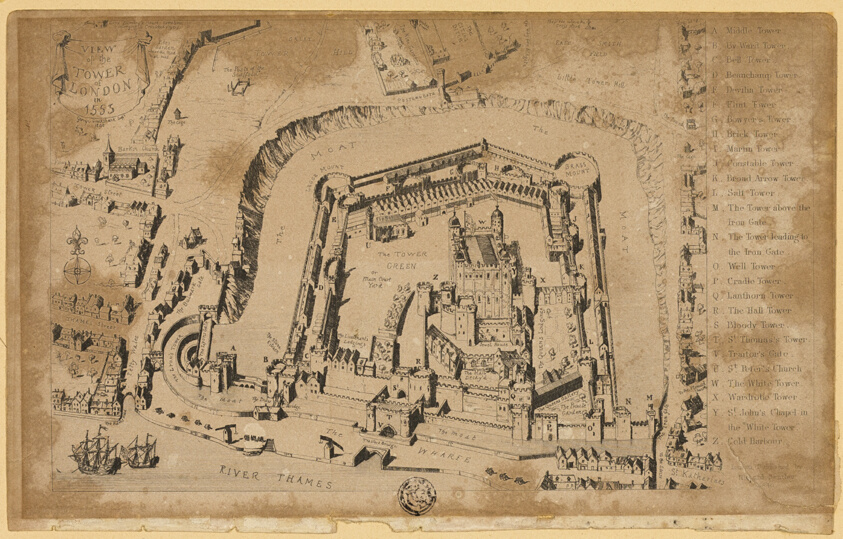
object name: Print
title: View of the Tower of London in 1553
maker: Unknown Artist; English, 19th century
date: 1840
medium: Engraving on tan wove paper, laid down on board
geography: England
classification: etching; print; prints and drawing